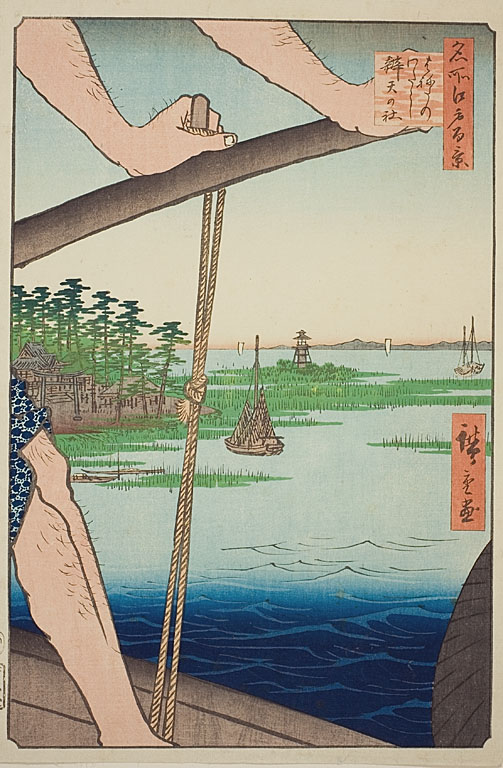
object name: Print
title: Haneda Ferry and Benten Shrine (Haneda no watashi Benten no yashiro), No.72 from the series "One Hundred Famous Views of Edo (Meisho Edo hyakkei)"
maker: Utagawa Hiroshige (Japanese, 1797-1858)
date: 1858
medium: Color woodblock print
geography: Japan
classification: woodblock print; print; asian art